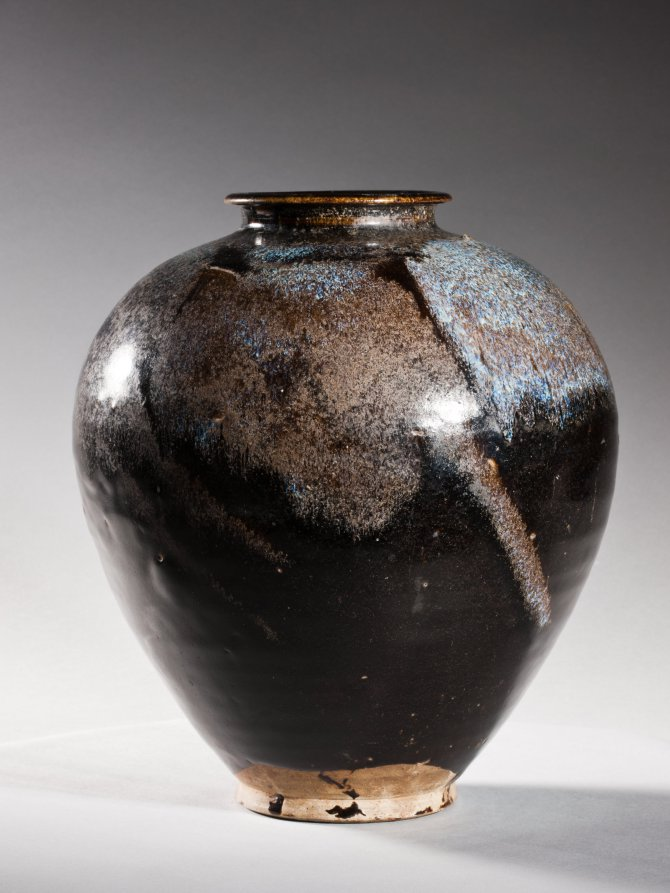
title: Jar: Black Ware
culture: China, Henan province, Huangdao kilns, Tang dynasty (618-907)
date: 700s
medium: glazed stoneware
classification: Ceramic